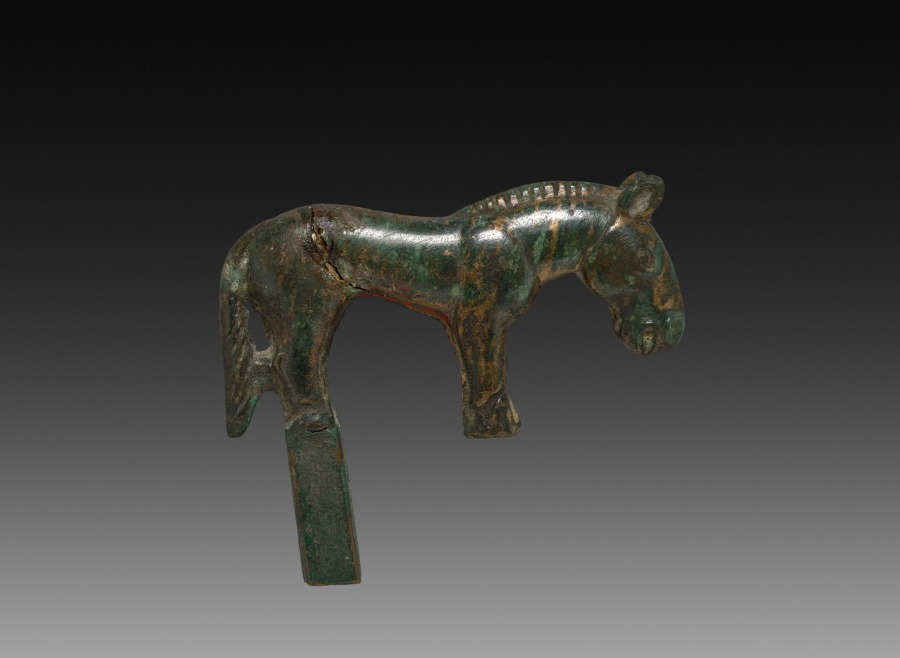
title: Wild Horse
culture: China, Ordos Region, Han dynasty (202 BCE–220 CE)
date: c. 100 BCE–100 CE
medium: cast bronze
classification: Sculpture